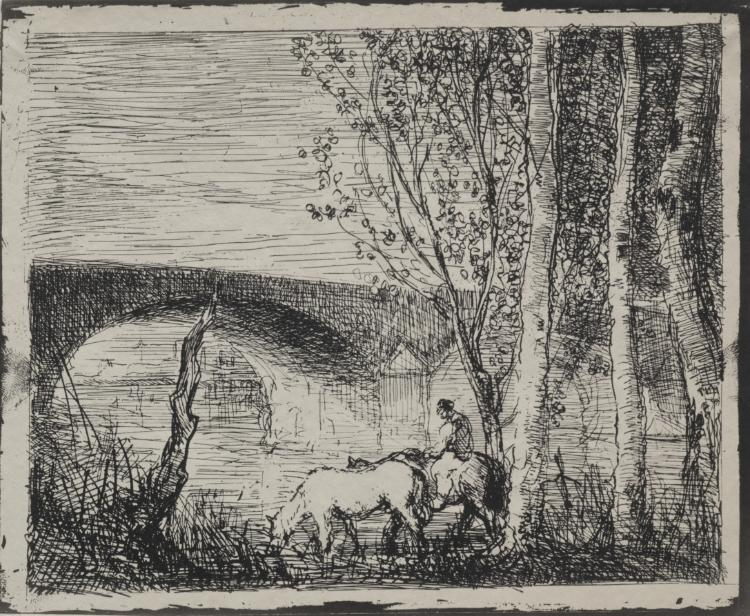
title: The Bridge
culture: France, 19th century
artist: Charles François Daubigny (French, 1817–1878)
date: original impression 1862, printed in 1921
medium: cliché-verre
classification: Print